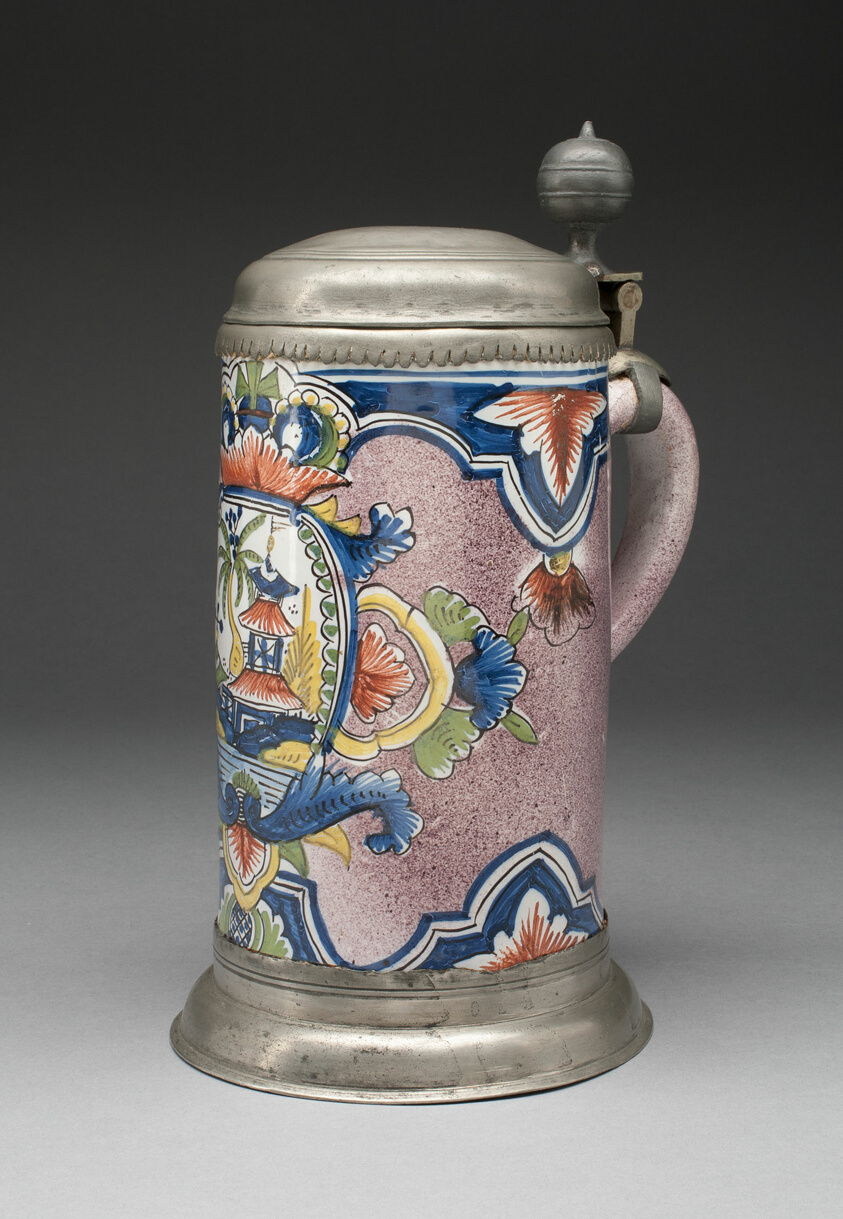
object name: Ceramics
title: Tankard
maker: Germany, Erfurt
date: 1730/50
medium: Tin-glazed earthenware (faience) and pewter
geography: Erfurt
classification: drinking vessel; earthenware; ceramics; european decorative arts